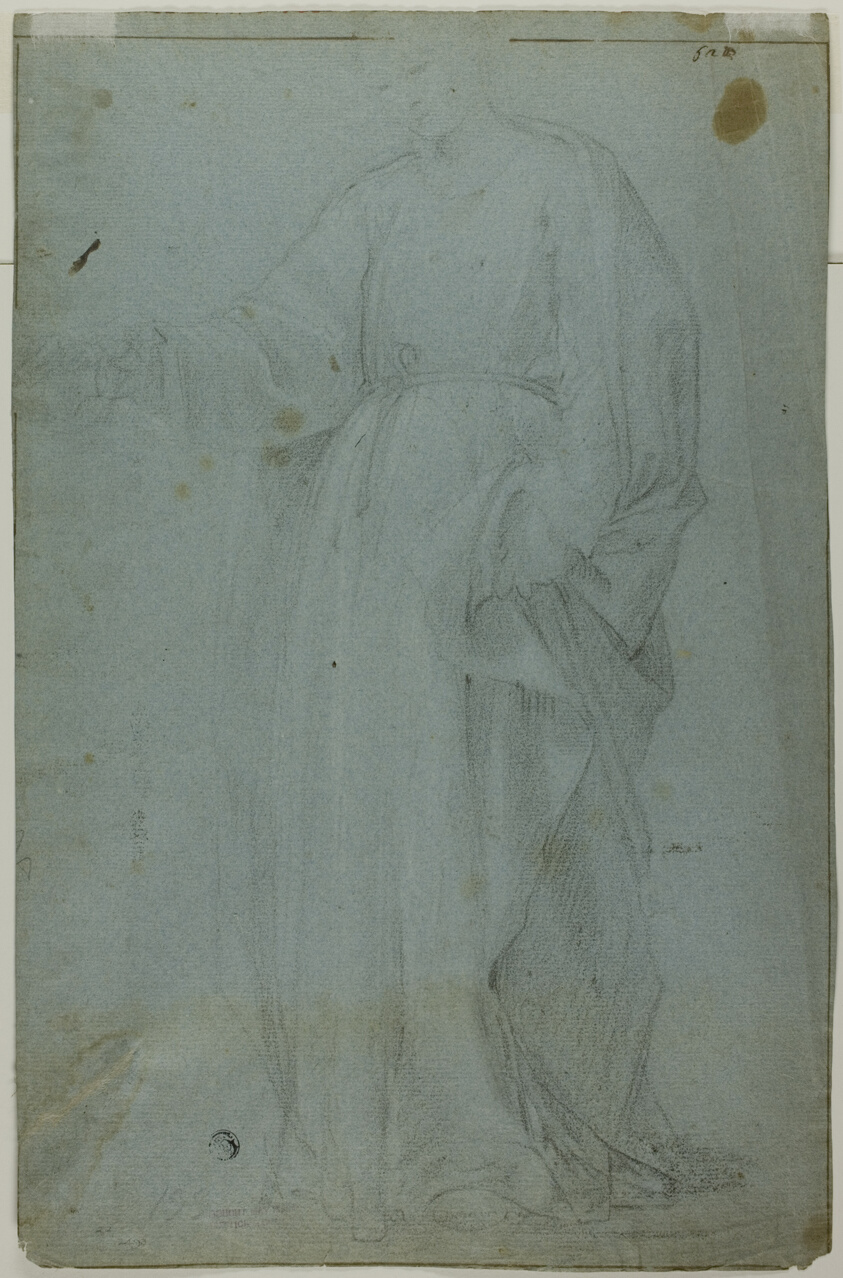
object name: Drawing and Watercolor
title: Samson and the Lion (recto); Virgin Mary with Right Arm Extended (verso)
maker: Probably Domenico Fiasella (Italian, 1589-1669); or possibly Lodovico Carracci (Italian, 1555-1619); or possibly a follower of Cesare Dandini (Italian 1596-1657)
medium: Black chalk (recto), and black chalk heightened with touches of white chalk (verso), on blue laid paper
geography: Italy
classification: drawings (visual works); prints and drawing